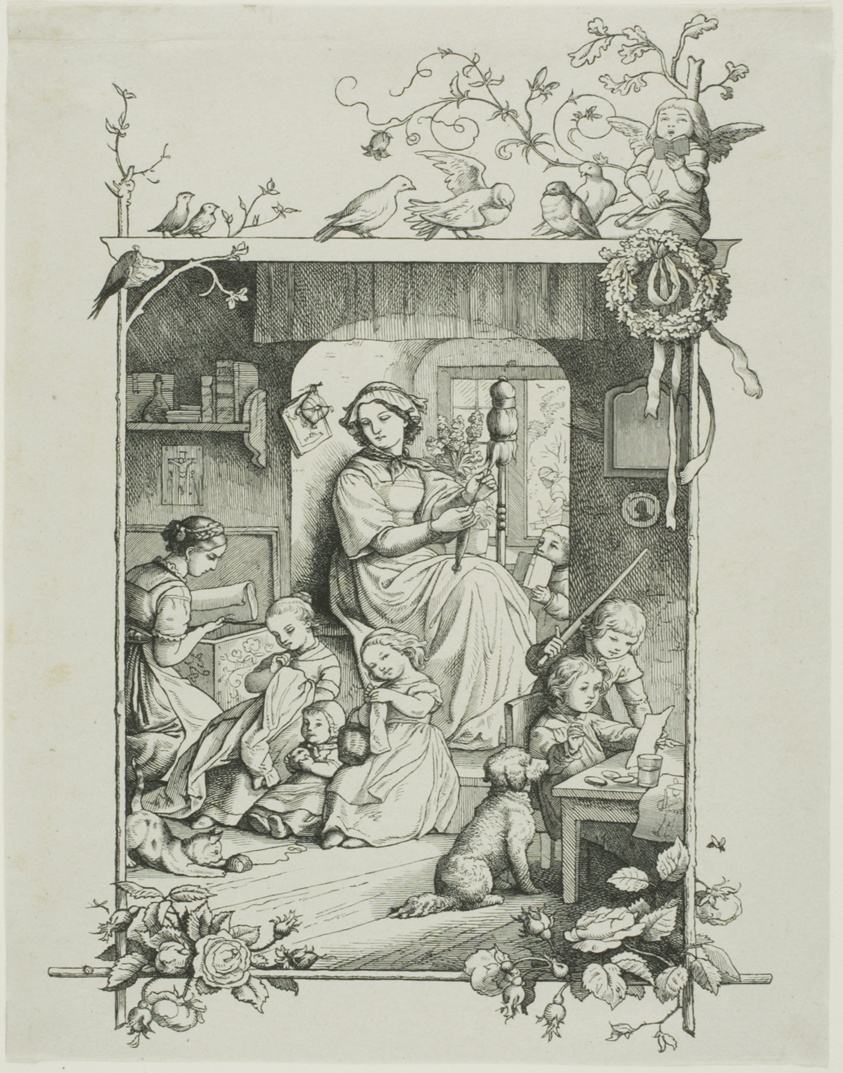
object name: Print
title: The Housewife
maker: August Gaber (German, 1823-1891); after Ludwig Adrian Richter (German, 1803-1884); published by Gaber & Richter (German, 1856-1860); written by Friedrich von Schiller (German, 1759-1805)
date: 1857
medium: Wood engraving in black on gray China paper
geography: Germany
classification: wood engraving; print; prints and drawing